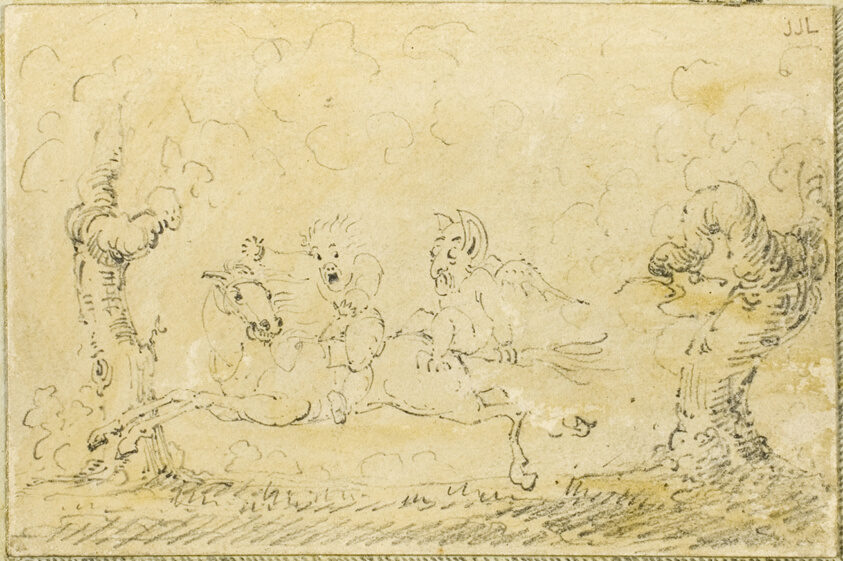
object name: Drawing and Watercolor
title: Comic Scene I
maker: George Cruikshank (English, 1792-1878)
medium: Pen and ink on paper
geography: England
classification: graphite; drawings (visual works); prints and drawing